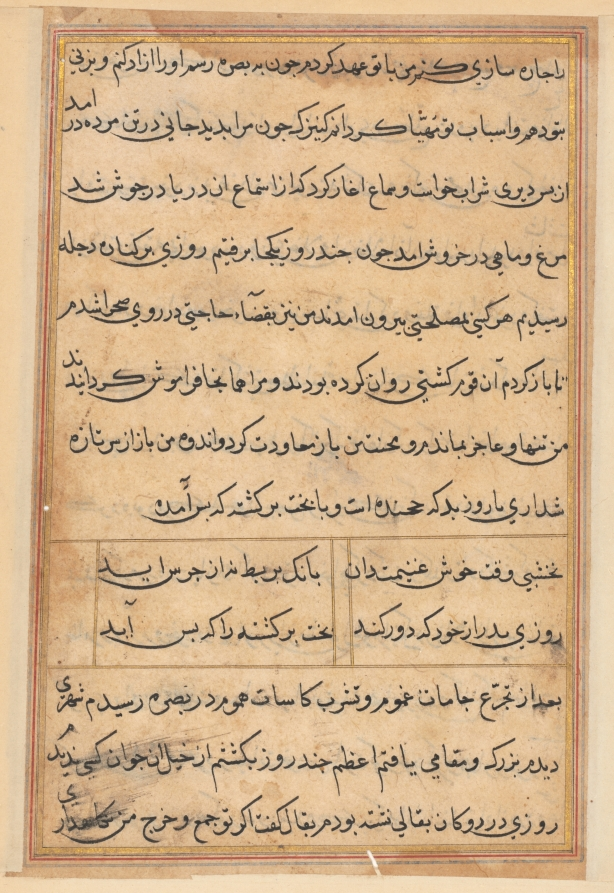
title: Page from Tales of a Parrot (Tuti-nama): text page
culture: Mughal India, court of Akbar (reigned 1556–1605)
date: c. 1560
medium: gum tempera, ink, and gold on paper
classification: Painting